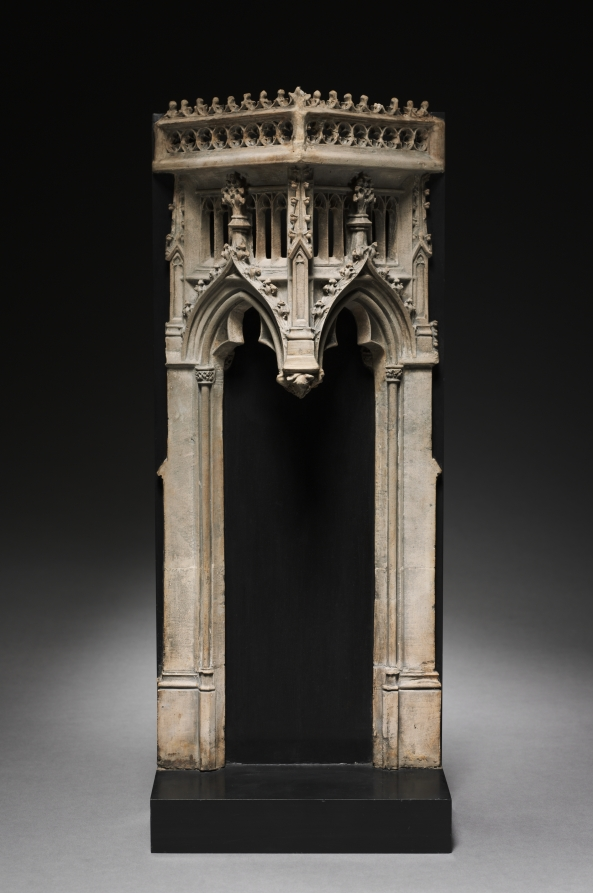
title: Architectural Canopy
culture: France, Burgundy, 15th century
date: c. 1450–1475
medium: limestone from Tonnerre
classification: Sculpture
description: Part of a pair of canopies, both must have originally belonged to an architectural ensemble like a tomb or a choir screen set within a church. Strikingly carved as architecture in miniature, they contain all of the elements of Flamboyant Gothic architecture of the late 15th century, so named after its flame-like stone tracery with wavy ornaments. This style of architecture is characterized by its intricacy of detailing and virtuosity of workmanship. Small sculptures may have originally occupied the space beneath the canopies.